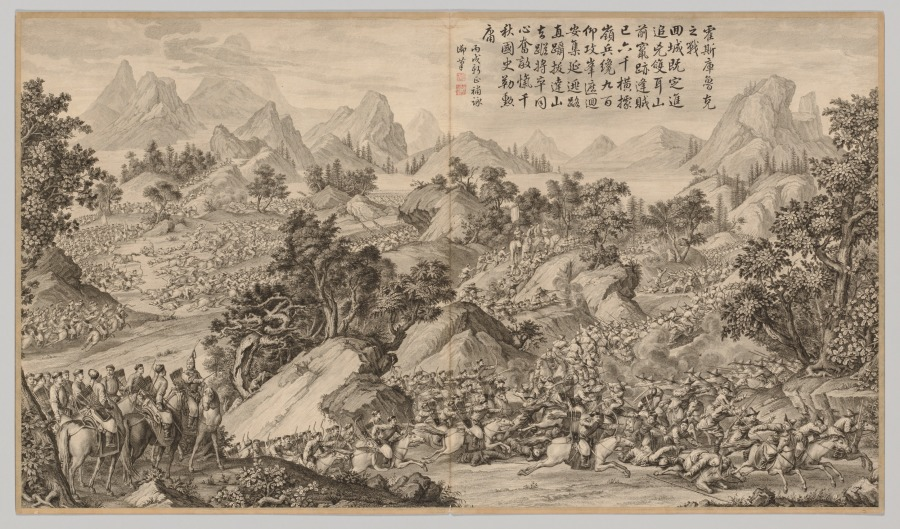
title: Battle at Heshi Kuluke: from Battle Scenes of the Quelling of Rebellions in the Western Regions, with Imperial Poems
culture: China, Qing dynasty (1644–1911), Qianlong reign (1736–95)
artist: Jean Damascene Sallusti (Italian, d. 1781)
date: c. 1765–74; poem dated 1766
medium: etching, mounted in album form, 16 leaves plus two additional leaves of inscriptions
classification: Print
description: This set of etchings was commissioned by Emperor Qianlong to record in pictorial terms the courage of his generals and soldiers in quelling the rebellions in the Western Regions. Qianlong added his own poem to each of the etchings, indicating his appreciation and pride in this demonstration of military might. "Western Regions" refers to the present-day Xingjiang province, often described in Western writing as "Central Asia."